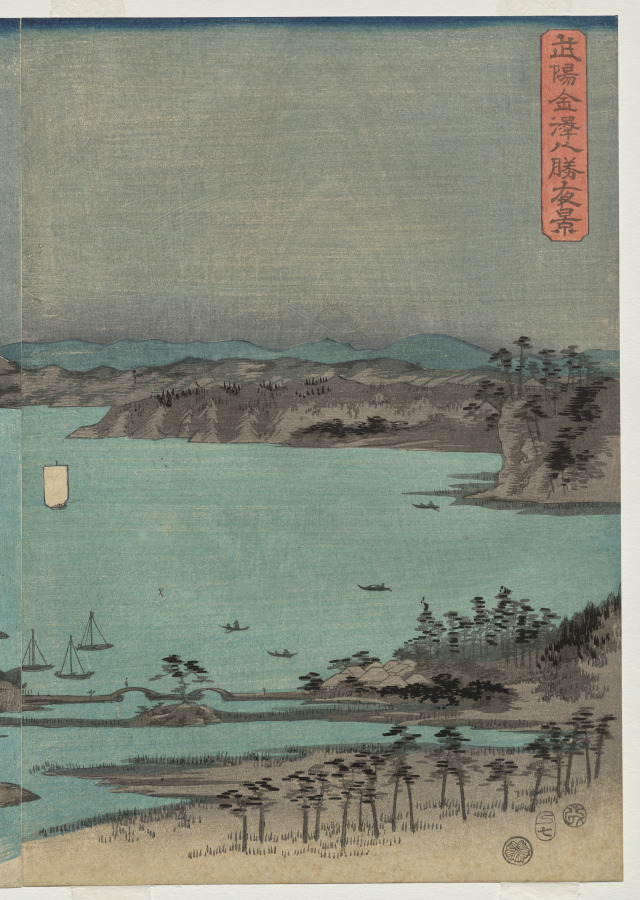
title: Evening View of the Eight Famous Places near Kanazawa Under Full Moon in Musashi Province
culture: Japan, Edo period (1615–1868)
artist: Utagawa Hiroshige (Japanese, 1797–1858)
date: 1857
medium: One of a triptych of color woodblock prints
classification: Print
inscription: Signature: Hiroshige hitsu Publisher: Okazawaya Taheiji (emblem) Censorship Seal: aratame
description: Late in his career, Hiroshige explored the poetic theme of setsugekka, “snow, moon, and flowers,” in a set of three triptychs. This panoramic scene shows the autumn moon over Kanazawa, near Tokyo. Hiroshige’s contemporaries would have recognized the coastline dotted with villages, fishing boats, and the distinctive double-arched bridge at the bottom right.